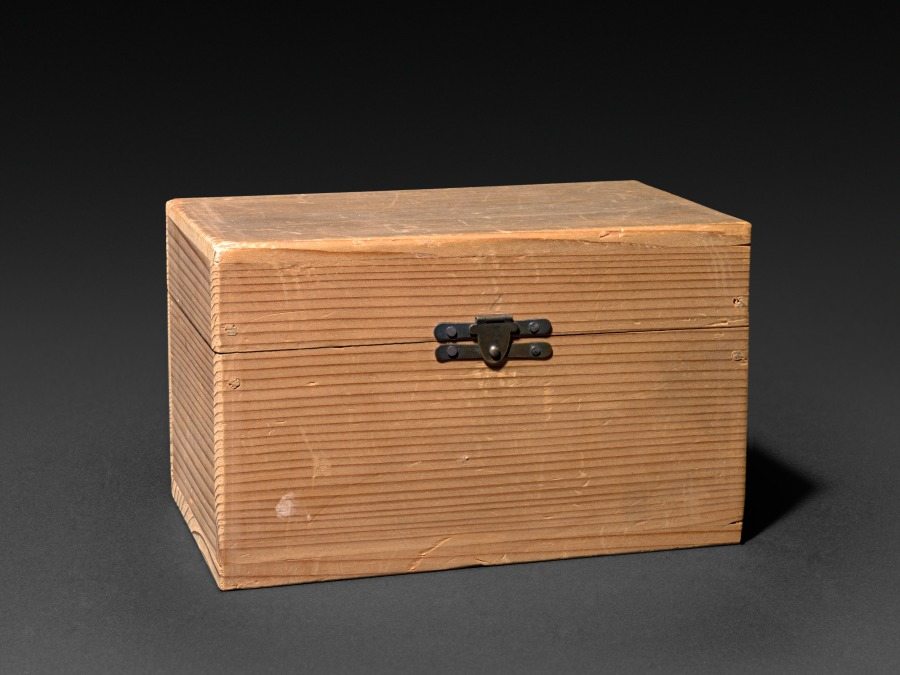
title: Vase (storage box)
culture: Japan, Meiji period (1868–1912) or Taishō period (1912–26)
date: early 1900s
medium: wood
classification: Enamel